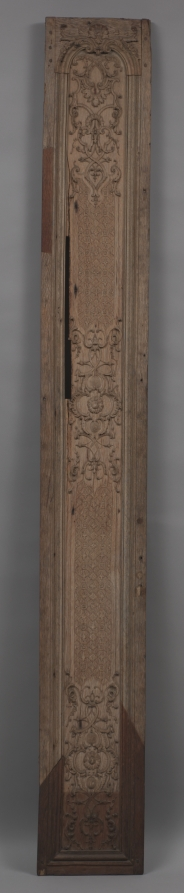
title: Panel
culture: France, Regency Period, 18th Century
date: 1715–1723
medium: wood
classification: Furniture and woodwork